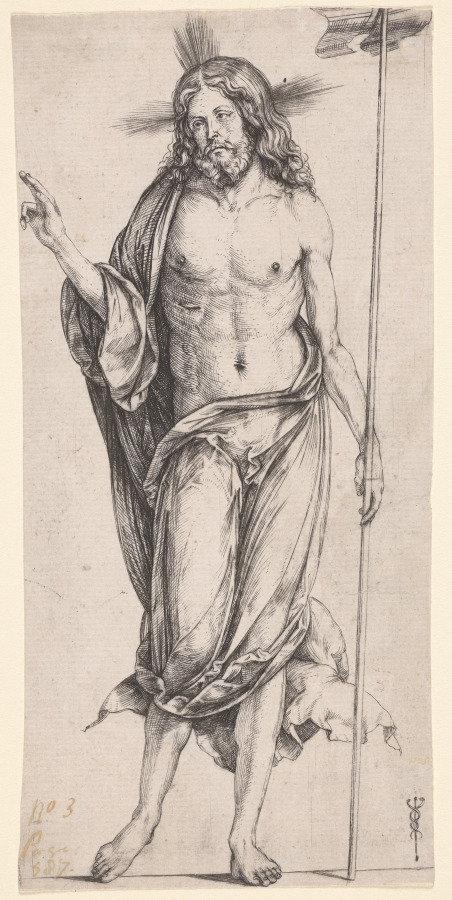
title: The Risen Christ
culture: Italy, 16th century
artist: Jacopo de' Barbari (Italian, c. 1460/70–c. 1516)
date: c. 1503–1504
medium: engraving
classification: Print